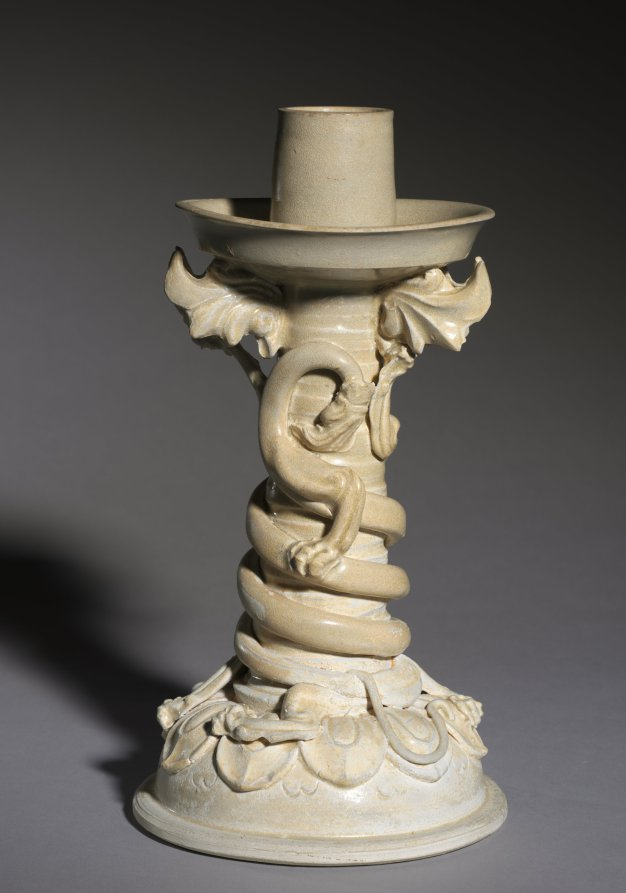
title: Candle Stand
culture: China, Sui dynasty (581-618) to early Tang dynasty (618-907)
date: 600s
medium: white stoneware with modeled and applied decoration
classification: Ceramic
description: This magnificent candle or lamp stand consists of a shallow dish and a cylindrical holder, below which is a columnar support embellished with palmette designs and two entwined dragons atop a lotus blossom pedestal. The creamy white stoneware is covered with a finely crackled clear glaze that shows a slight yellow-green tinge where it is thick. The search for a white clay body represented a technical advancement of the kilns in northern China, anticipating the development of the true high-quality white porcelains during the late Tang period.